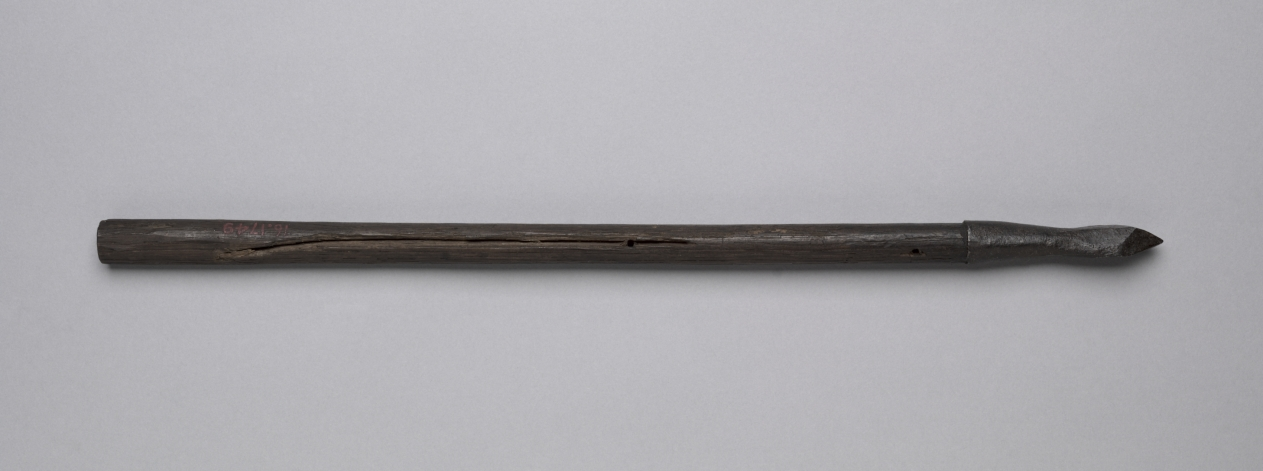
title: Crossbow Bolt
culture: Germany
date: 1500s-1600s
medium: wood, leather, steel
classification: Arms and Armor